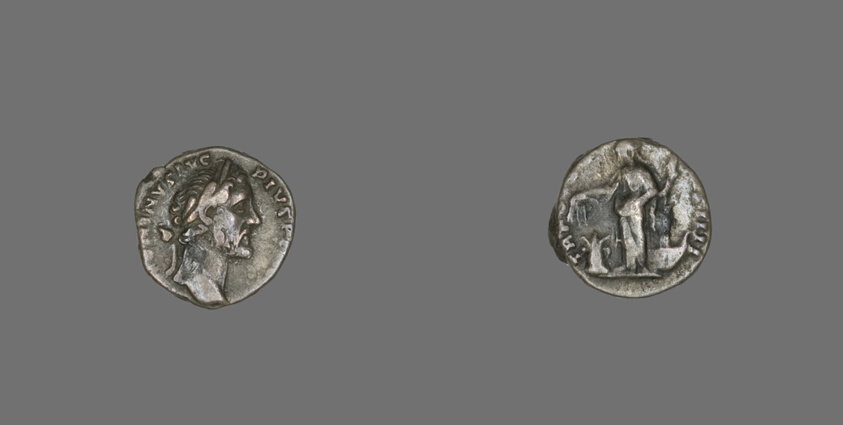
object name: Coin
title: Denarius (Coin) Portraying Emperor Antoninus Pius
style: roman (ancient, style or period), ancient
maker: Roman, minted in Rome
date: 157-158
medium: Silver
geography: Roman Empire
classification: coin; ancient art; struck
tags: goddesses, agriculture